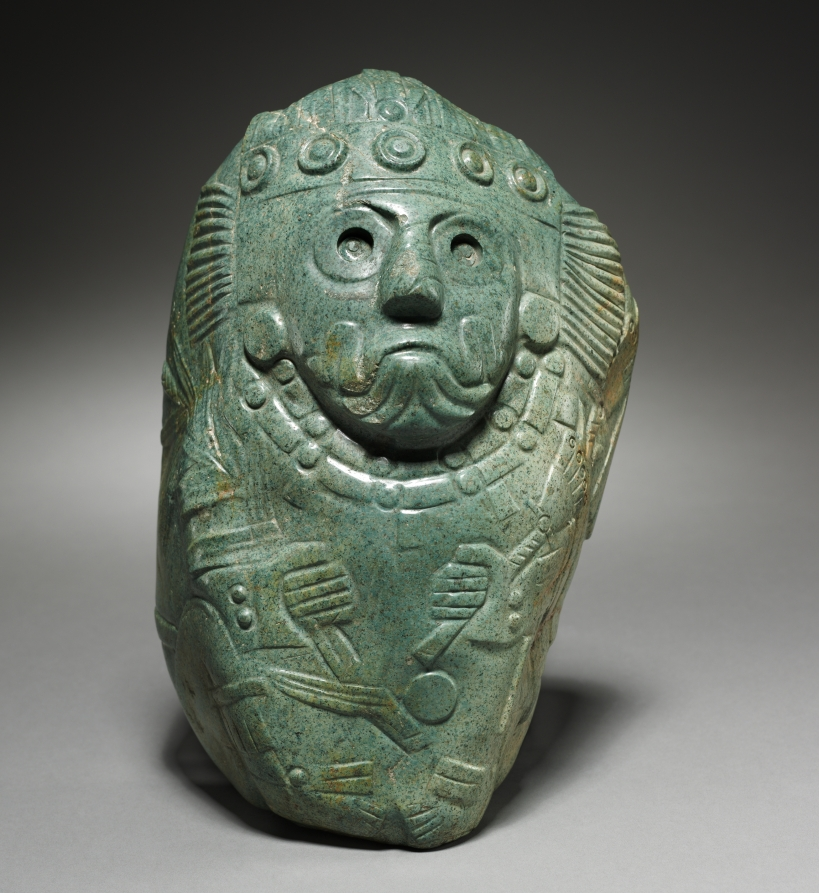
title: Tlaloc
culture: Central Mexico, Aztec, 13th-16th century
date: c. 1200–1519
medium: stone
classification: Sculpture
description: A natural cobble of greenstone has been smoothed and carved in low relief to portray the Aztec rain god Tlaloc, recognizable by his ringed eyes, twisted nose element, and fanged mouth. As the provider of water, Tlaloc is a patron of agriculture and holds a stalk of maize in one hand. To the Aztecs, Tlaloc was an ancient and civilized god; his worship could be traced back to the ancient ruined site Teotihuacan.